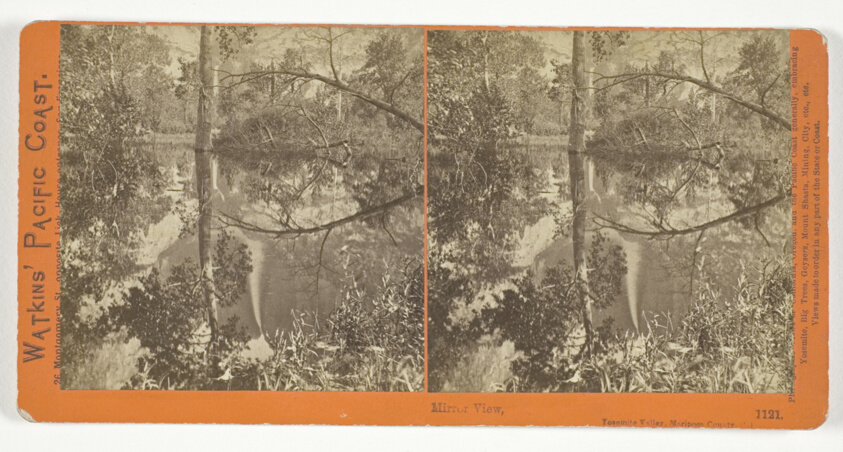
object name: Photograph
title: Mirror View, Yosemite Valley, Mariposa County, Cal.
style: 19th century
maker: Carleton E. Watkins; American, 1829-1916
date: 1861/76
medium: Albumen print, stereo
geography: United States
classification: stereograph (albumen); albumen silver print; photographic process; photography; photograph